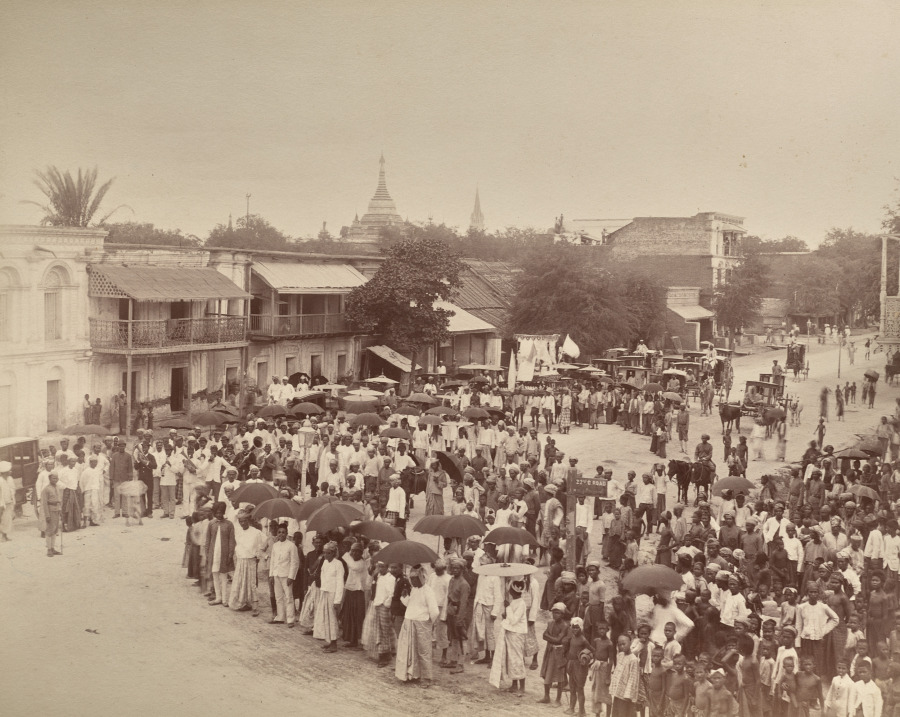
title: Untitled (procession or crowd) (verso)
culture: England, 19th century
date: 1870s-1880s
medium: albumen print mounted on an album page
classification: Photograph